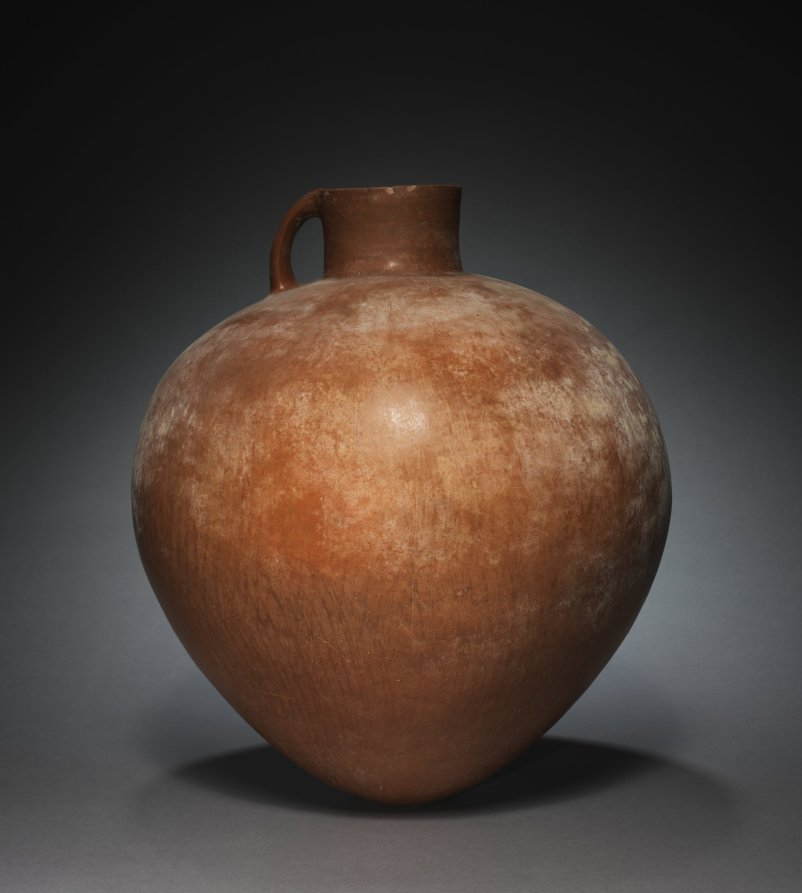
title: Red-Burnished Jug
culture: Iran, Amlash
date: 1000–700 BCE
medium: earthenware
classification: Ceramic